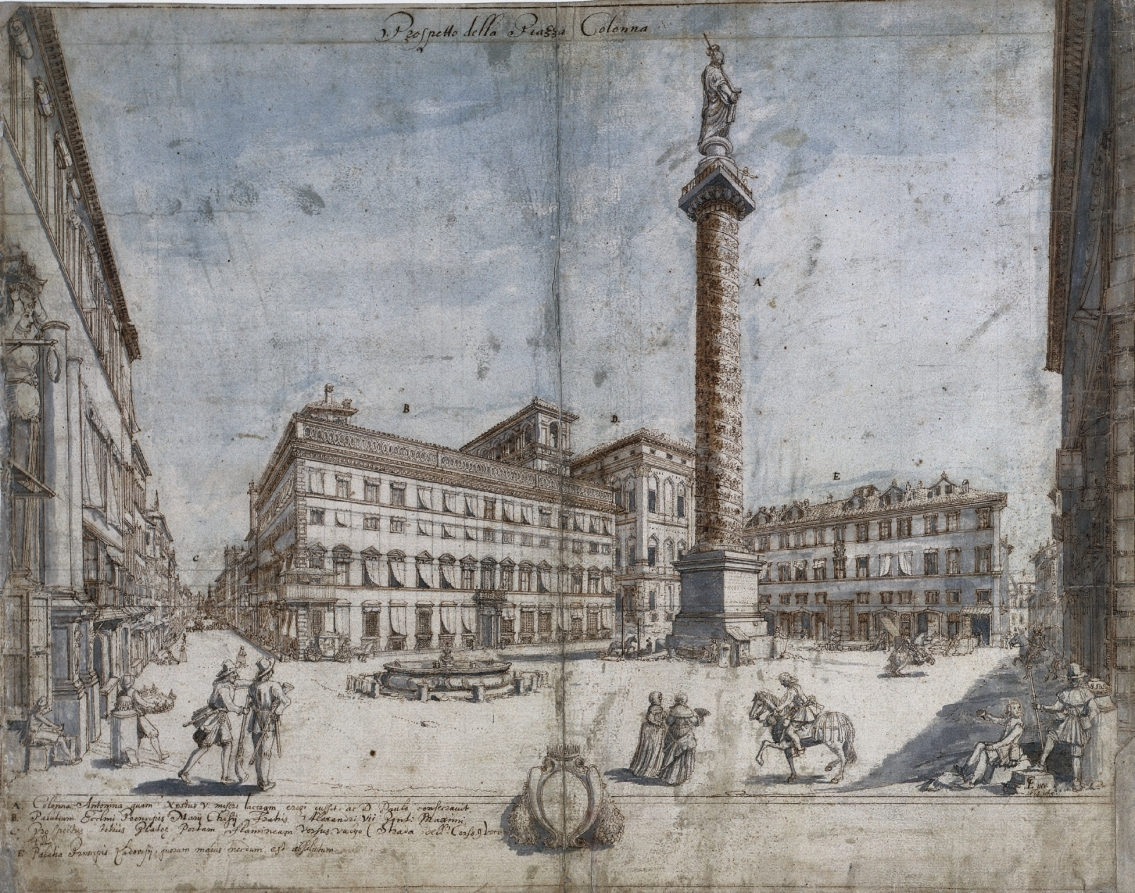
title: Eighteen Views of Rome: The Piazza Colonna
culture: Flanders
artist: Lievin Cruyl (Flemish, c. 1640-c. 1720)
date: 1664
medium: pen and brown ink and brush and gray and blue wash over stylus and graphite; framing lines in brown ink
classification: Drawing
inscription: signed, lower right, in brown ink: [artist monogram: LC] inv. / 1664 Ag. ; by artist, upper center, in brown ink: Prospetto della Piazza Colonna ; by artist, throughout composition, in brown ink: [the letters A-E] ; by artist, lower left, in brown ink: A. Colonna Antonina, quam Xystus V. misere laceram erigi ussit, ac D Paulo conservavit. / B. Palatium Ecclmi Principis Marij Chisij Fratris Alexandri vii Pont: Maximi. / C Prospectus totius Plateæ Portam Flamineam versus.vulgo (Strada dell'Corso) Voca= / tam. / E Palatia Principis Ludovisij, quorum maius necdum est absolutum. ; VERSO, upper left, in brown ink?: 5 upper left, in graphite: 545 ; ON STRIPS OF PAPER MOUNTED TO VERSO, lower right, in graphite: Albertina 20968 ; lower right, in graphite: #2